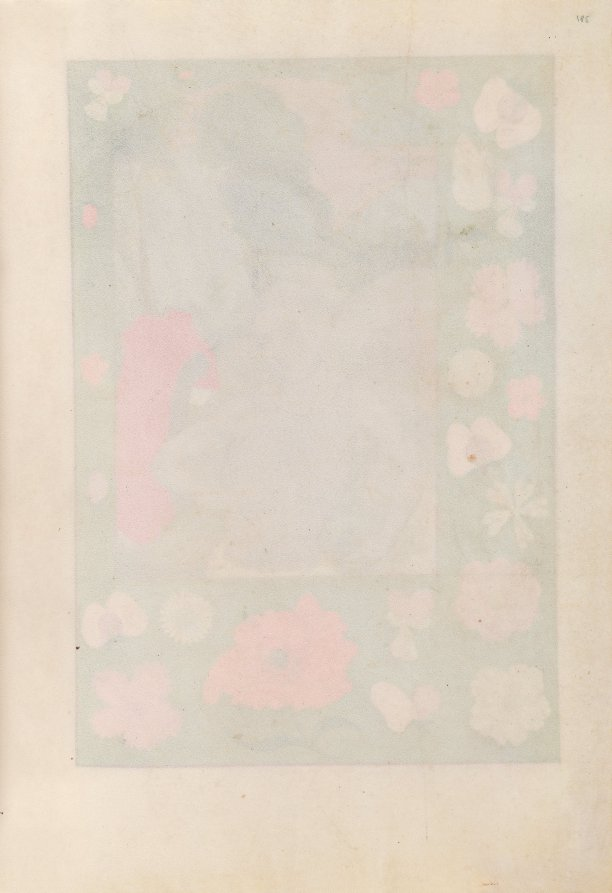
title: Hours of Queen Isabella the Catholic, Queen of Spain: Fol. 185r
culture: Flanders, Ghent and Bruges, late 15th century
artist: Master of the First Prayerbook of Maximillian (Flemish, c. 1444–1519)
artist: and Associates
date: c. 1500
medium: ink, tempera, and gold on vellum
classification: Bound Volume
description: This manuscript was illuminated by a circle of at least five highly organized manuscript painters active in the Flemish cities of Ghent and Bruges. The principal illuminator was Alexander Bening, who painted the majority of the book's miniatures. Manuscripts produced by this circle of artists are renowned for the decoration of their borders, which typically feature a rich variety of realistically-painted flowers, birds, and butterflies. This prayer book, called a book of hours, was intended not for a cleric, but for the private devotions of a lay person-in this case, Isabella the Catholic, Queen of Spain (1451-1504). Isabella's coat of arms embellishes the book's frontispiece. It is unlikely that the book was commissioned by the Queen herself; rather, she probably received it as a diplomatic gift from someone courting her patronage, perhaps Cardinal Francisco Jimenez de Cisneros. A Franciscan friar, Jimenez was dependent upon Isabella for his advancement, first to the post of Queen's confessor in 1492, and then to Archbishop of Toledo in 1495.